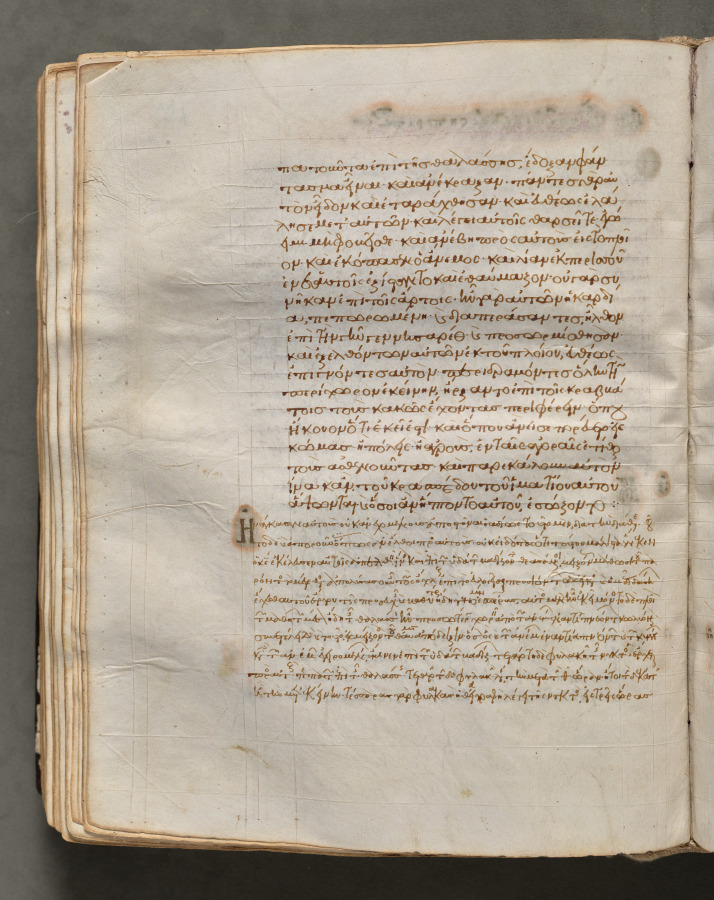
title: Text, folio 153 (verso), from a Gospel Book with Commentaries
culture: Byzantium, Constantinople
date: c. 1000–1100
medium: ink, tempera, and gold on vellum; leather binding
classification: Bound Volume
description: Each of the four gospels in this book opens on a page with brilliantly illuminated borders depicting the author of the text as well as birds-principally peacocks, symbols of the immortality of the soul-and fountains, representing the fountain of life and the salvation of the soul. This volume consists of 428 leaves with texts in Greek. Its level of sophistication suggests that it was probably written and decorated in a monastery in Constantinople.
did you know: Gospel Books were carried in procession through Byzantine churches.